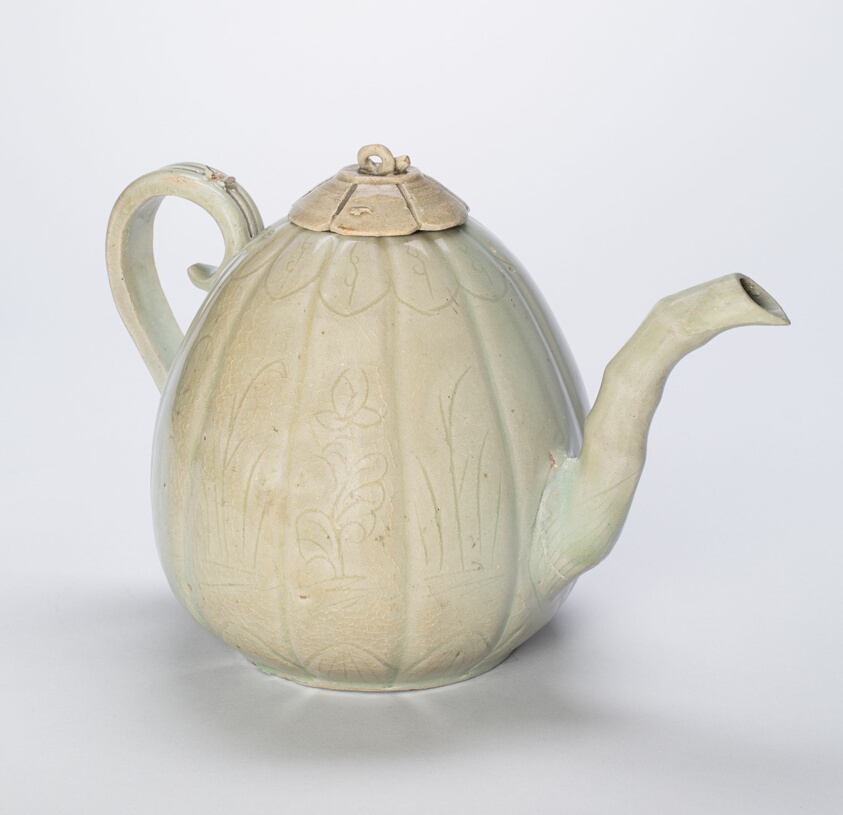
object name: Vessel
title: Ewer in the Form of a Melon with Bamboo Spout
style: Korean (culture or style)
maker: Korea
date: Goryeo dynasty (918–1392), 12th century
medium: Celadon-glazed stoneware with underglaze molded decoration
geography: Korea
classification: ewer (vessel); vessel; stoneware; asian art; ceramics